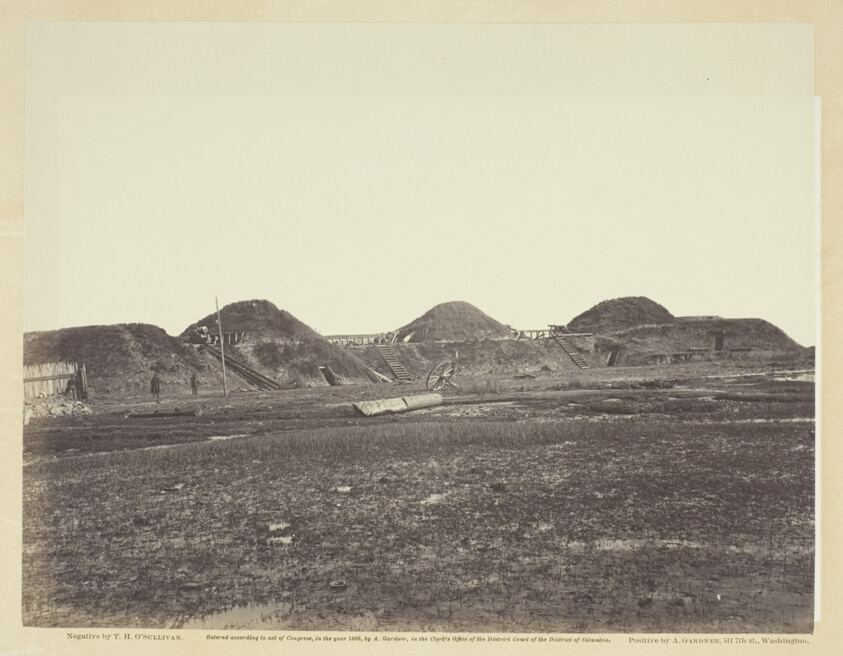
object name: Photograph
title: Three First Traverses on Land End, Fort Fisher, North Carolina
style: 19th century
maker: Timothy O'Sullivan (American, born Ireland, 1840–1882)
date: January 1865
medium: Albumen print, pl. 78 from the album "Gardner's Photographic Sketch Book of the War, Volume II" (1866)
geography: United States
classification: photograph; albumen silver print; photography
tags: Collected by Hugh Edwards, Gardner's Photographic Sketch Book